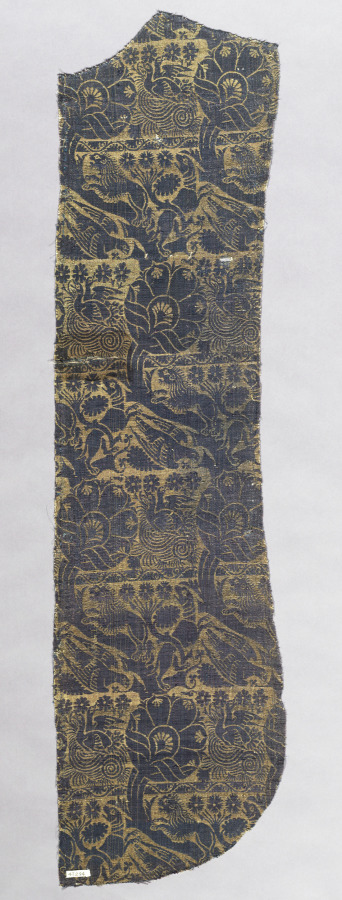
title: Chasuble Fragment with Realistic Animals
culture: Italy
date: c. 1420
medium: Silk, gold thread; lampas weave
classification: Textile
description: Around 1400 an emerging interest in the bucolic world of nature encouraged a new trend among textile designers, as seen in the lions, hawks, dogs, and ducks on this luxury silk fragment. The continual influence of Chinese asymmetry, however, is evident in the prominent undulating palmette trees, enlarged from sinuous vines frequently seen in Italian silks and velvets from this period.